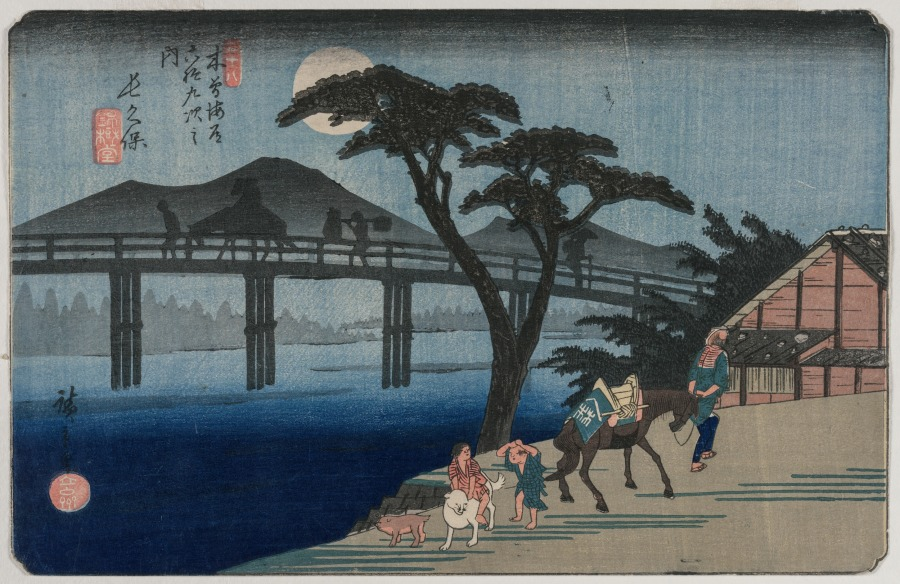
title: Nagakubo (Station 28) from the series Sixty-Nine Stations of the Kisokaido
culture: Japan, Edo period (1615–1868)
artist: Utagawa Hiroshige (Japanese, 1797–1858)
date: 1835 or 1836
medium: color woodblock print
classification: Print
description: The inland road connecting Edo (present-day Tokyo) and Kyoto, the Kisokaidō had 69 post stations, similar to contemporary freeway rest areas. These prints of the mountainous Kisokaidō offered urban print collectors views of scenic spots without the inconveniences of travel. Moonlight silhouettes travelers leaving the Nagakubo station, while a figure with a walking stick approaches it across the Wada Bridge. In the foreground, a man leading his weary horse gazes at the moon while children play with dogs.